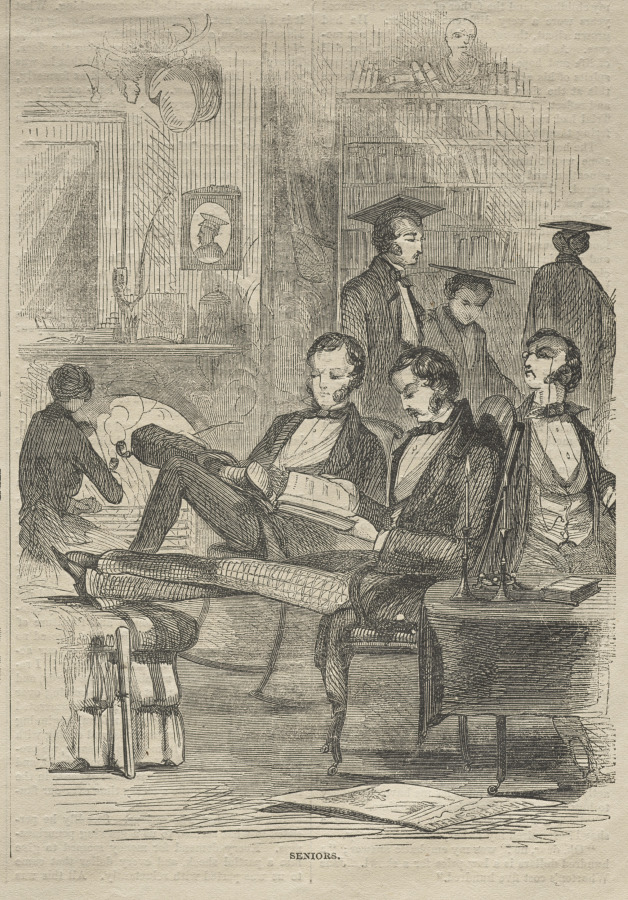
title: Seniors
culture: America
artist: Winslow Homer (American, 1836–1910)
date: 1857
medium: wood engraving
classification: Print